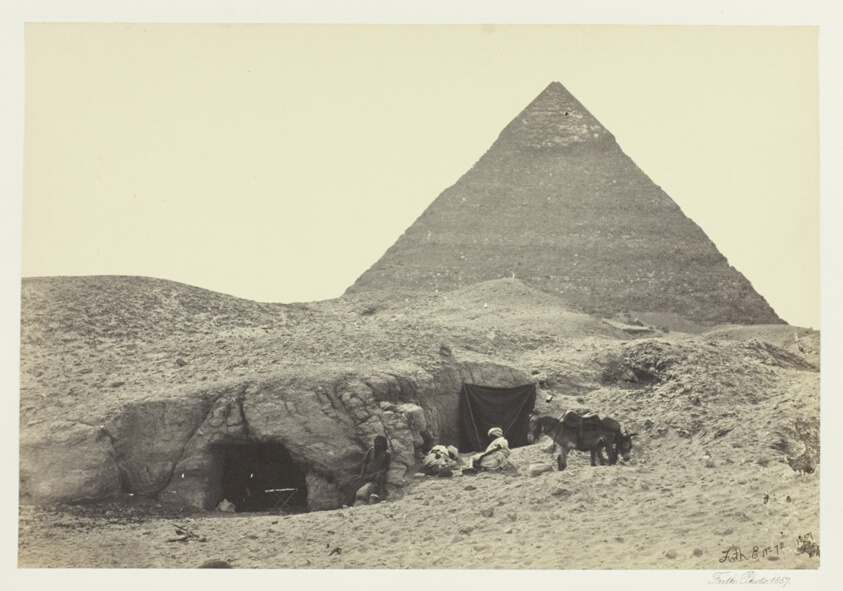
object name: Photograph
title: Rock-Tombs and Belzoni's Pyramid, Gizeh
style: 19th century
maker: Francis Frith (English, 1822–1898)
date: 1857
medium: Albumen print, pl. 29 from the album "Egypt and Palestine, Volume II" (1858/60)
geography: England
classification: albumen silver print; photographic process; photography; photograph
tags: Collected by Hugh Edwards, Egypt and Palestine